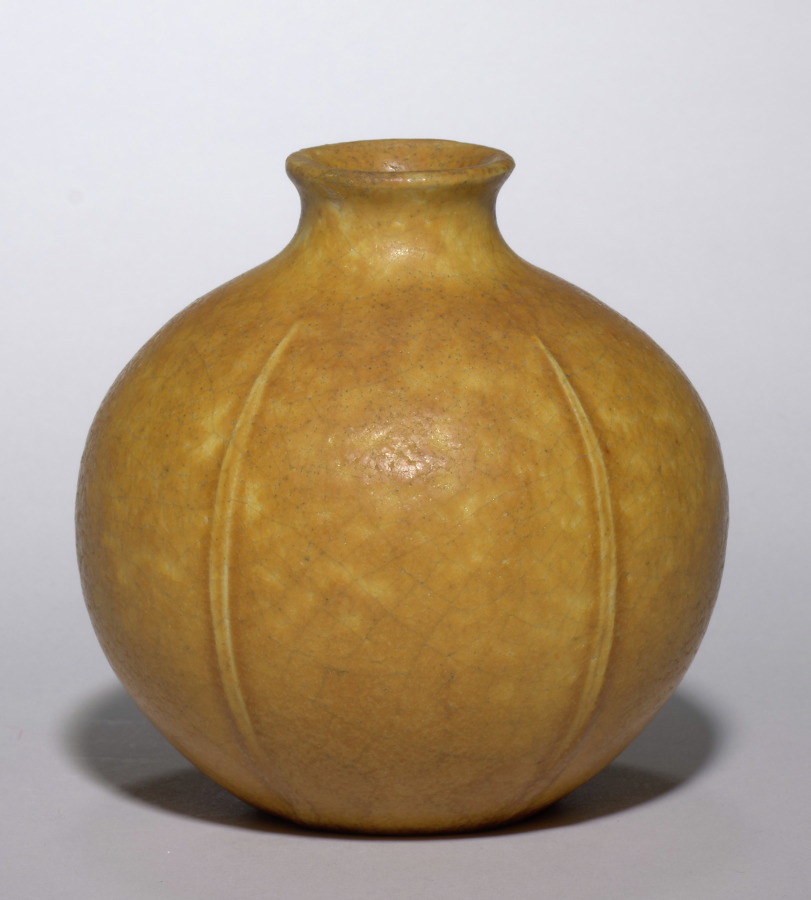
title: Vase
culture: America, Massachusetts, Boston, early 20th Century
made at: Grueby Pottery Company (American)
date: c. 1900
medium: ceramic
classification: Ceramic